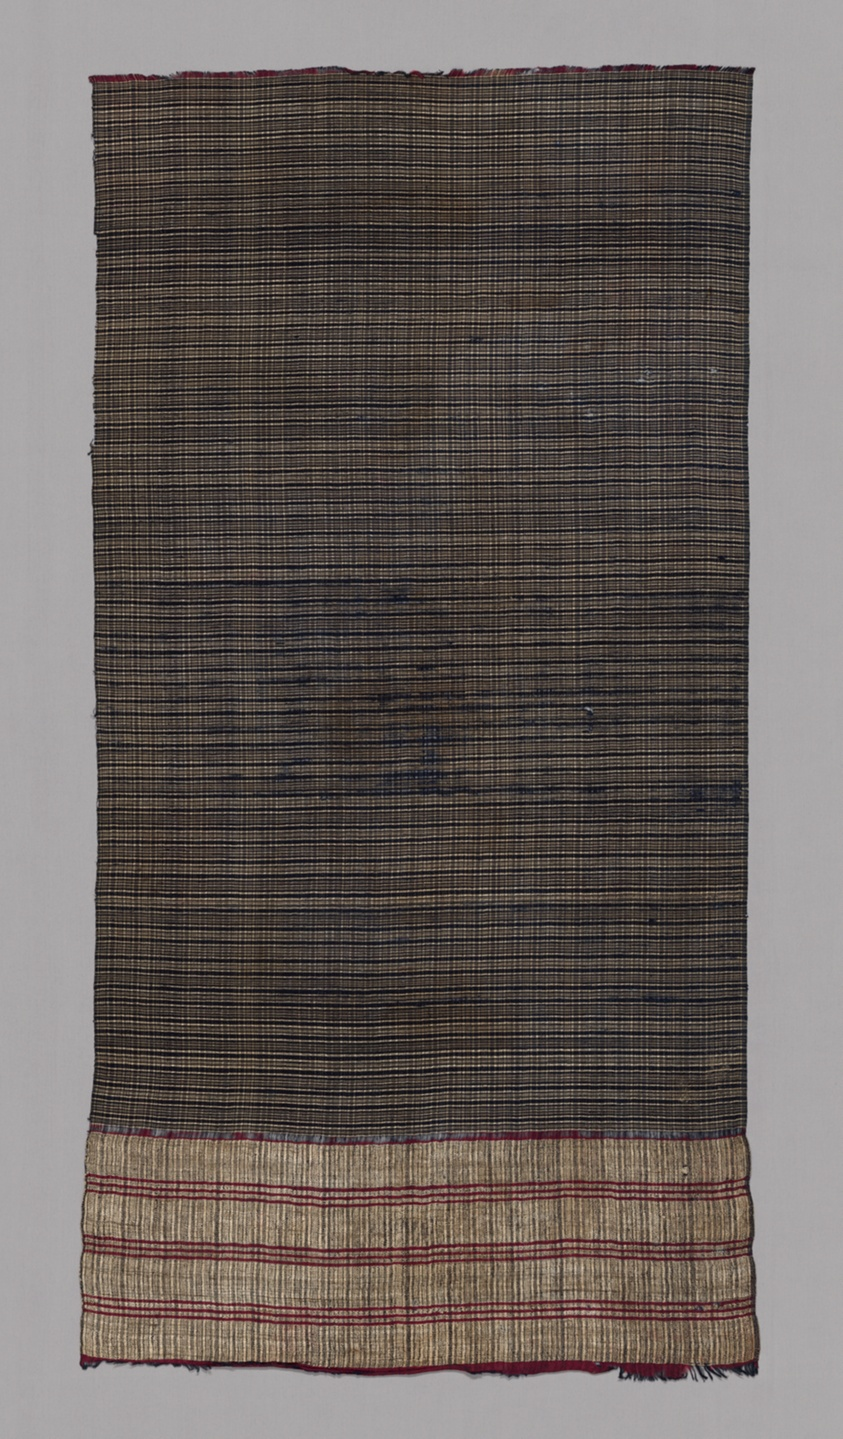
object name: Religious/Ritual Object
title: Ceremonial Textile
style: indonesian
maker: Indonesia, Bali, Buleleng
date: 19th century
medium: Cotton, silk, and gold-leaf-over-lacquered-paper-strip-wrapped bast fiber (probably ramie), bands of plain weave, main warp fringe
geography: Bali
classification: textile; weaving; ritual objects